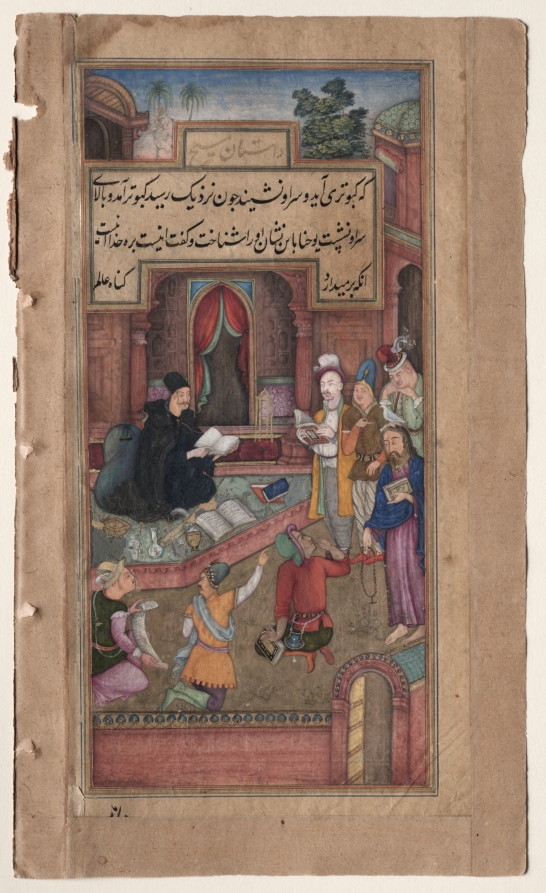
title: John the Baptist recognizes Christ by the appearance of a dove (folio 50 verso), from a Mirror of Holiness (Mir’at al-quds) of Father Jerome Xavier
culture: Mughal India, Allahabad, made for Prince Salim (1569–1627)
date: 1602–4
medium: Gum tempera, ink, and gold on paper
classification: Manuscript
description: Wearing the black robes and cap of a Jesuit priest, John the Baptist sits in a well-appointed Mughal-style courtyard. According to Father Jerome’s text, John recognizes Jesus by the dove who sits on his head. Possibly Father Jerome intended to relate the Gospel account that describes the dove of the Holy Spirit as hovering in the air above his head. The artist’s own reactions to this passage may be reflected in the expressions and gestures of the onlookers, who seem incredulous and bemused at this sign.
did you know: Jesus holds a rosary with a cross even in scenes prior to his crucifixion.